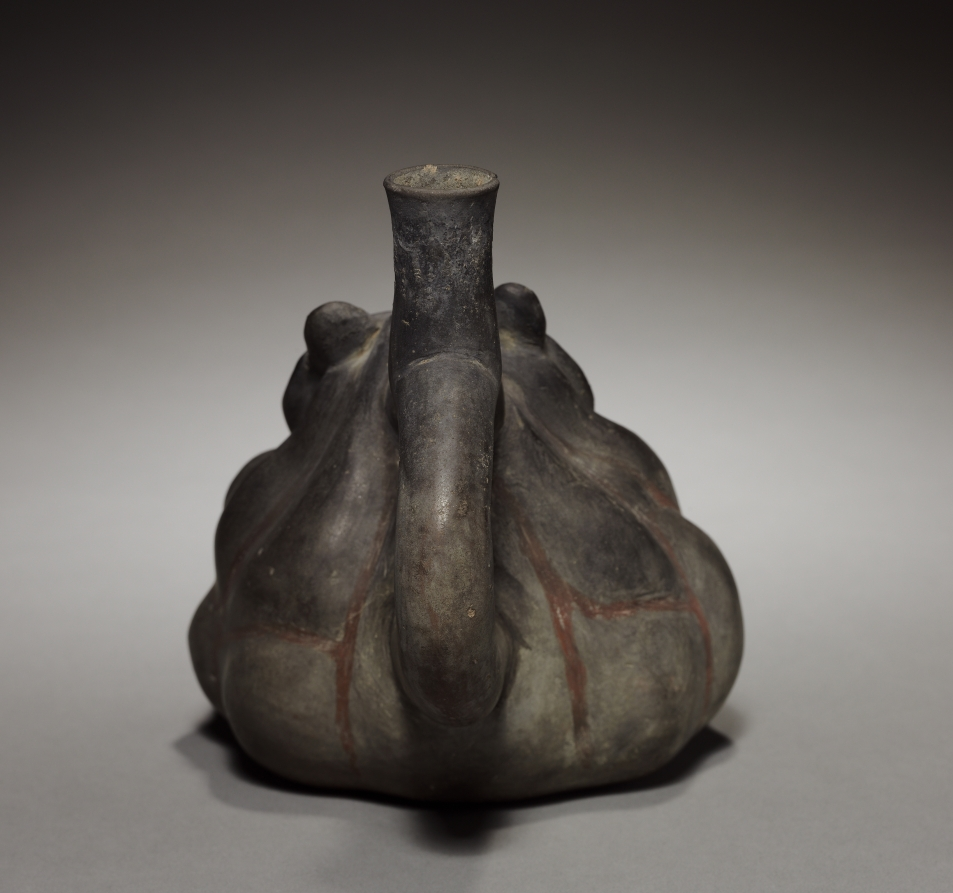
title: Bottle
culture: Peru, Chimú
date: 900–1470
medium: black ware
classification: Ceramic